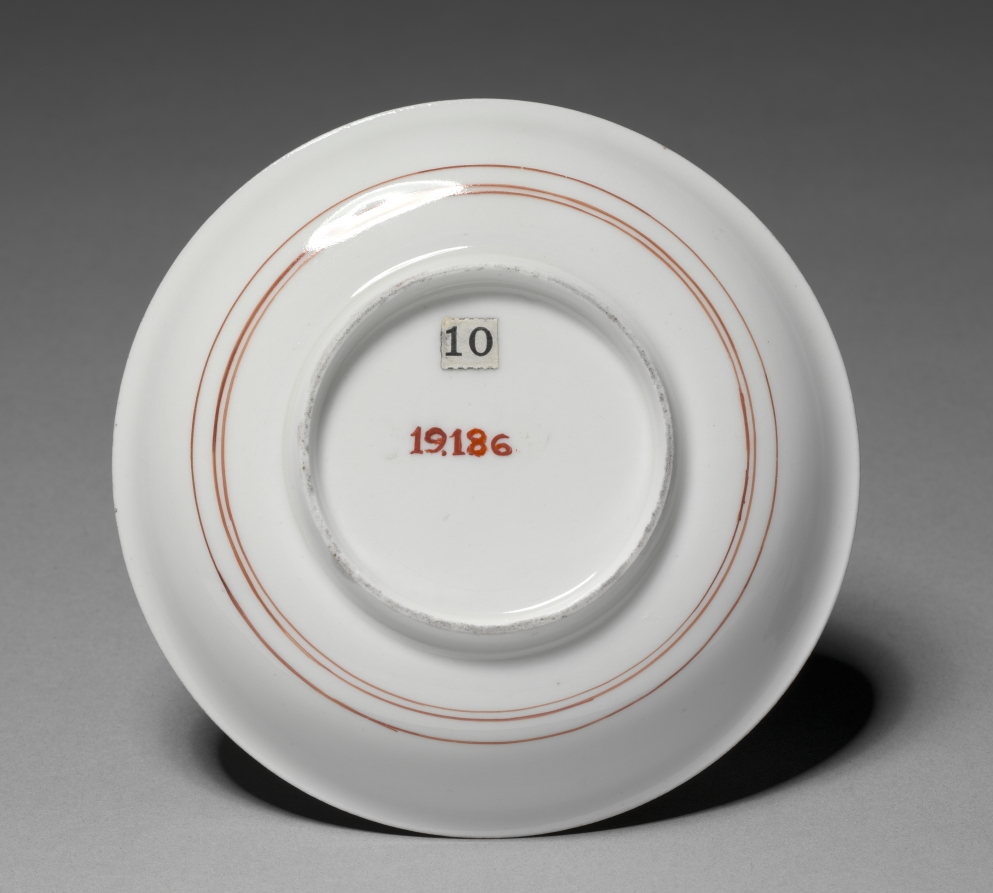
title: Saucer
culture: Germany, Meissen, 18th century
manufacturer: Meissen Porcelain Factory (German, est. c. 1710)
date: c. 1723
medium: porcelain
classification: Ceramic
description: In 1720 Johann Gregor Herold became art director of the Meissen factory and developed the styles of decoration that made it famous. Both the quality and the variety of enamel colors were improved, and the paste achieved the brilliant whiteness and perfection of surface that characterizes mature Meissen wares. Herold introduced "chinoiserie" decorations, in which comparatively large-scale half-length figures were set against landscapes with cloudy skies. The high quality of its painting suggests that Herold himself may have decorated this saucer.